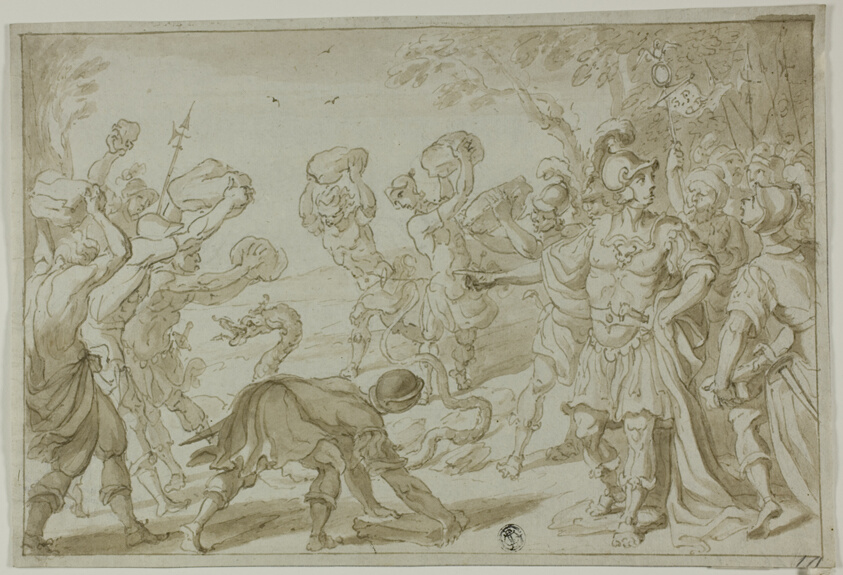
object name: Drawing and Watercolor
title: Roman Soldiers Stoning a Serpent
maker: Abraham Bloemaert (Dutch, 1566-1651)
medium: Pen and brown ink, with brush and brown wash, over touches of black chalk, on ivory laid paper, tipped on blue laid paper with red fibers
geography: Holland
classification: pen and ink drawings; drawings (visual works); prints and drawing